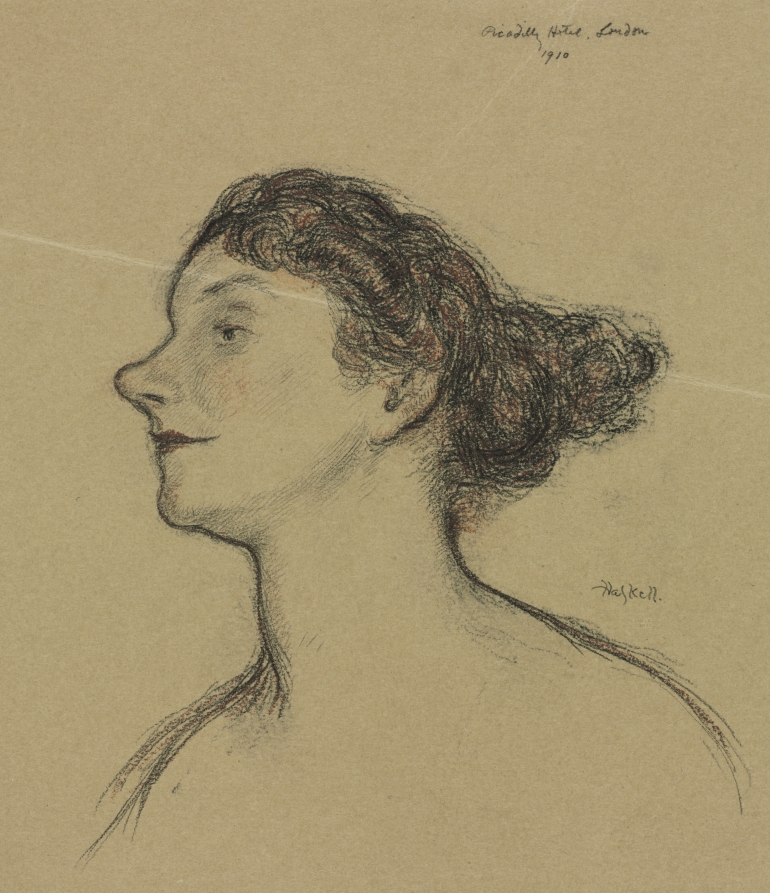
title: Yvette Guilbert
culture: America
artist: Ernest Haskell (American, 1876–1925)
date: 1910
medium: pencil and crayons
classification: Drawing